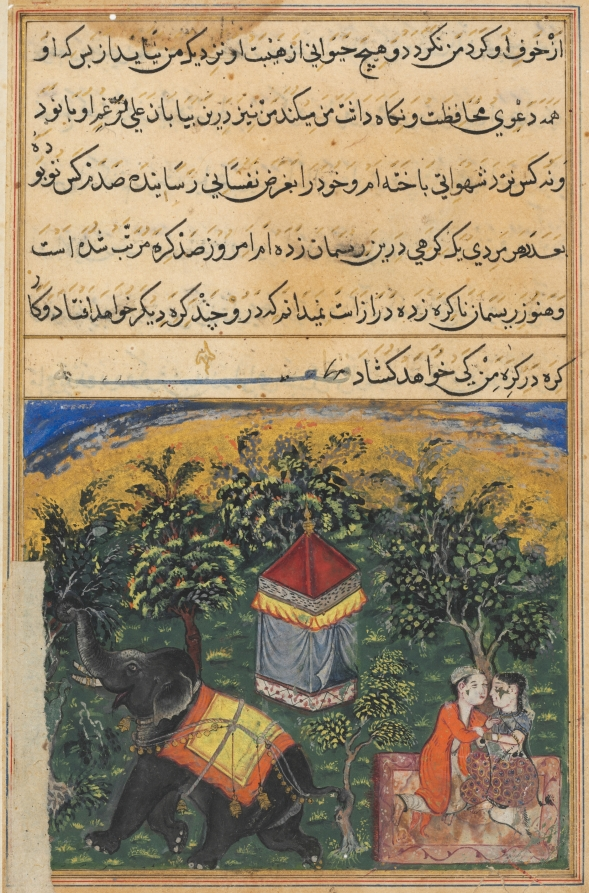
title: The mendicant’s wife deceives him with a soldier, from a Tuti-nama (Tales of a Parrot): Fourth Night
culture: Mughal India, court of Akbar (reigned 1556–1605)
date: c. 1560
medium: gum tempera, ink, and gold on paper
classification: Painting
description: According to this story, written in Persian, a skilled yogi in India reached such a high level of practice that he was able to perform acts of transformation. Anxious to prevent his wife from committing adultery, he transformed himself into an elephant and carried her hidden in a howdah on his back and stayed only in the deep forest, away from men. One day, when the elephant was out foraging for food, a lone soldier came upon the wife, and they made love. The moral of the story is that no matter how extreme the lengths to which one might go to prevent adultery, if someone is inclined to do so, it will happen.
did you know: Discoloration around the elephant’s face and legs indicate that his body has been repositioned.